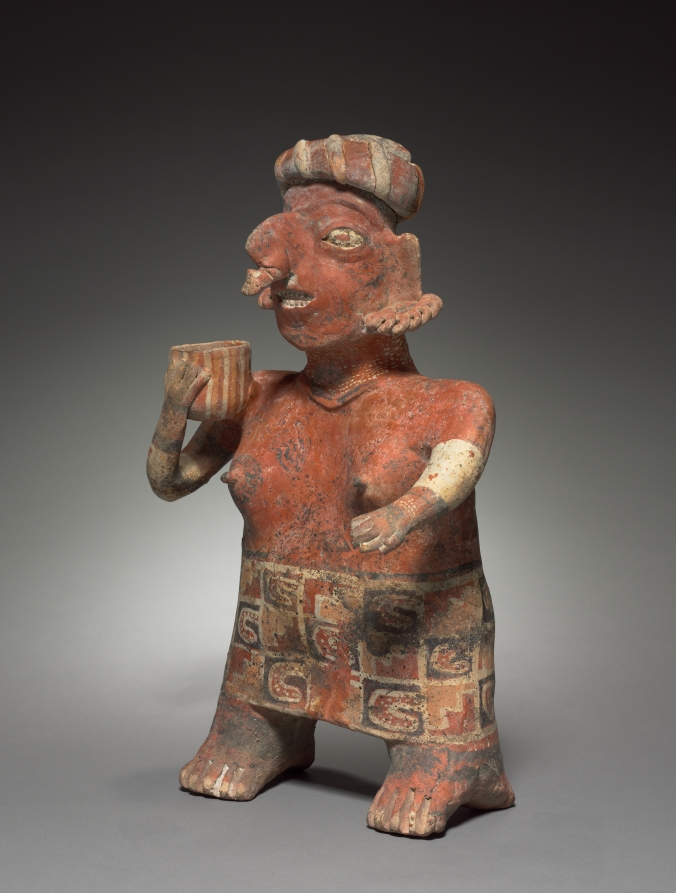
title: Standing Female Figure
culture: Mexico, Nayarit, Ixtlan del Rio style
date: c. 100 BCE–300 CE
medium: earthenware with colored slips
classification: Sculpture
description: Nagarit ceramic sculputres, like those of Colima, were manufactured for burial with the dead. The popular male-female couples may be portraits of the individuals with whom they were buried. This female figure, dressed in a colorful skirt and hat, has painted or tattooed patterns on her torso and face. Jewelry adorns her face, ears, and nose. The vessel on her shoulder symbolizes her domestic duties.